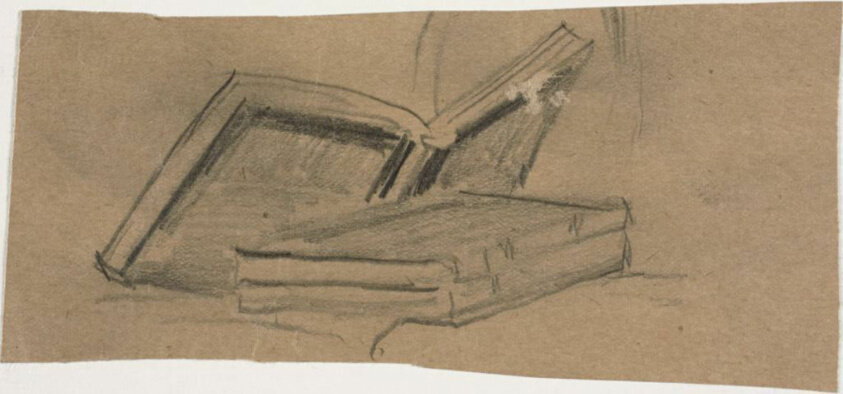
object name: Drawing and Watercolor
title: Sketch of Two Books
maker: William Michael Harnett (American, born Ireland, 1848-1892)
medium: Graphite, with smudging on tan wove paper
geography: United States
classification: graphite; drawings (visual works); prints and drawing